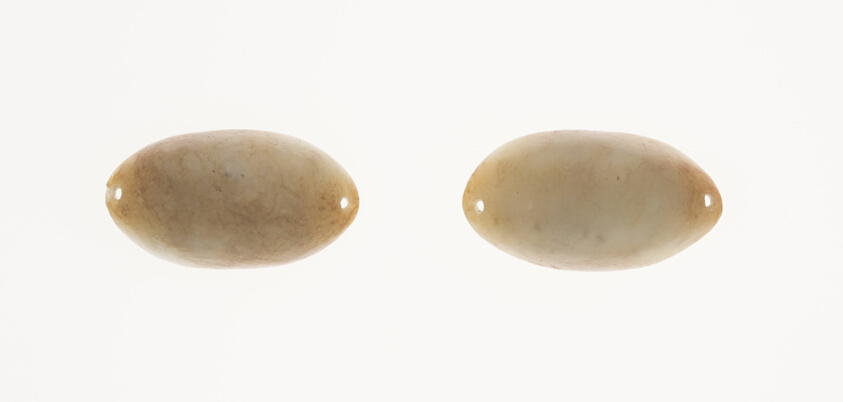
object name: Costume and Accessories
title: Eye Cover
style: Chinese (culture or style)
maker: China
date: Style of Eastern Zhou period or Han dynasty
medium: Jade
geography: China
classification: jade; asian art; costume